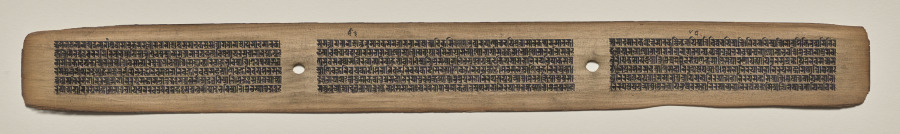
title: Text, Folio 64 (recto), from a Manuscript of the Perfection of Wisdom in Eight Thousand Lines (Ashtasahasrika Prajnaparamita-sutra)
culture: Eastern India, Bihar, Vikramashila Monastery. Painting: Nepal, Kathmandu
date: Sunday, September 14, 1119 (year 239 of the Newar Samvat in the month of Ashvina)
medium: gum tempera and ink on palm leaves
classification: Painting